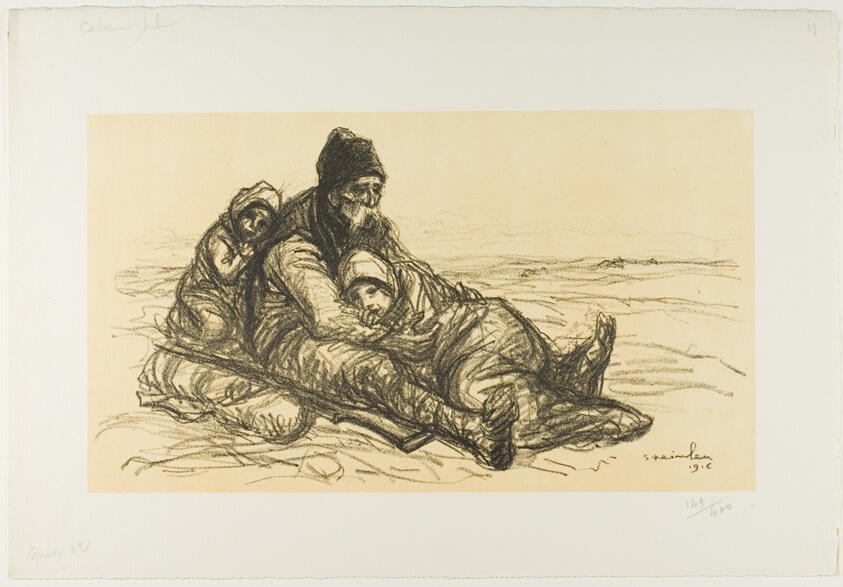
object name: Print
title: Serbian Cavalry, Second Episode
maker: Théophile-Alexandre Steinlen; French, born Switzerland, 1859-1923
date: 1916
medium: Lithograph in black with scraping on stone over fawn tint on thick off-white wove paper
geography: France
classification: lithograph; print; prints and drawing